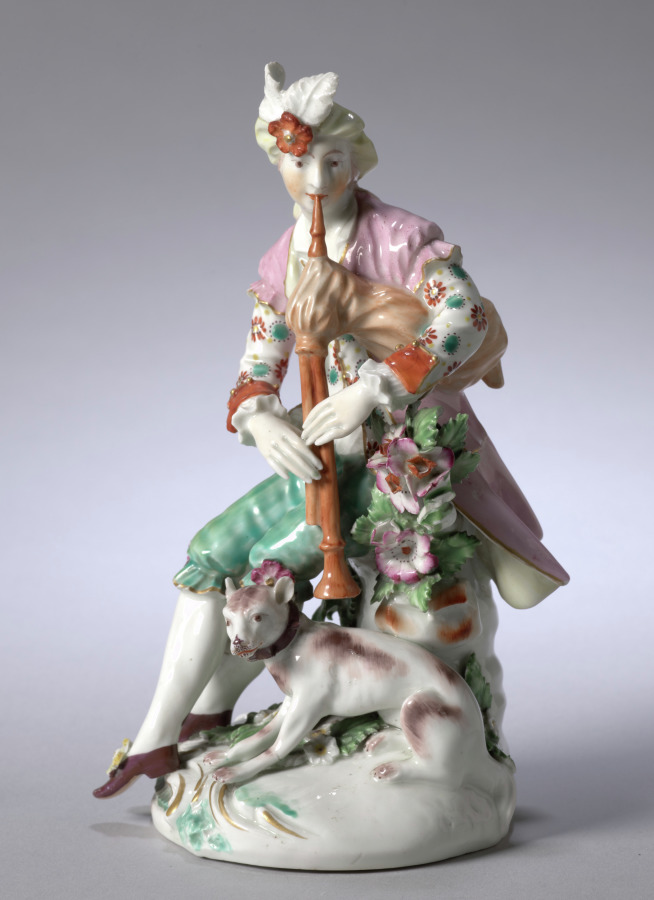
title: Seated Musician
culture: England, Derby, 18th century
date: c. 1765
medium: soft-paste porcelain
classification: Ceramic